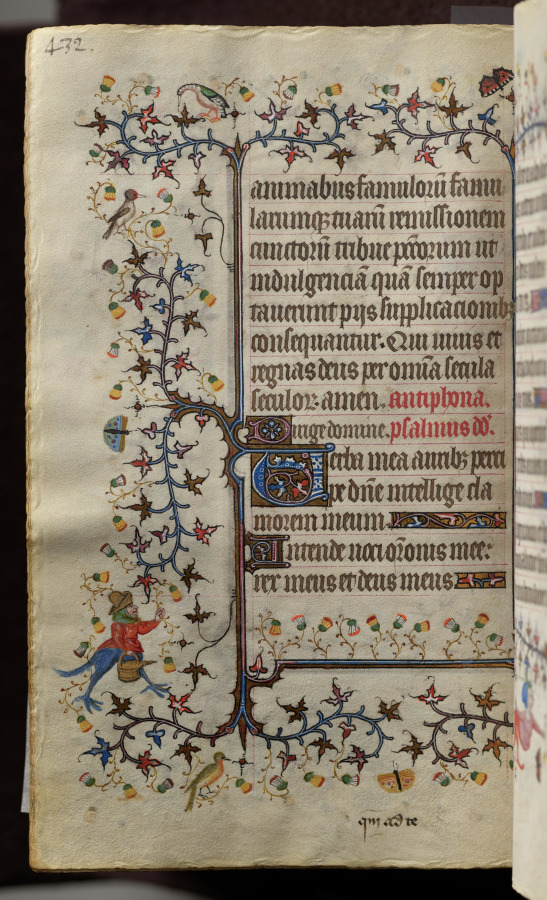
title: Hours of Charles the Noble, King of Navarre (1361-1425): fol. 210v, Text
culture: France, Paris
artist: Master of the Brussels Initials and Associates (French)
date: c. 1405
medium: ink, tempera, and gold on vellum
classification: Bound Volume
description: This precious volume was obviously highly prized by its owner, the French-born King of Navarre, who had his coat of arms painted on no less than twenty folios. Rather than directly commissioning this manuscript from a specific workshop, it seems that Charles the Noble acquired his book of hours -- perhaps ready-made for the luxury market -- while on a trip to Paris in 1404-05. A collaborative effort, six painting styles are evidenced within the pages of this codex, those of two Italians, two Frenchmen, and two Netherlanders. The painter who was responsible for the planning and decoration of the book, and who produced seventeen of the large miniatures, was a Bolognese artist known as the Master of the Brussels Initials. His principal assistant, responsible for most of the borders, was a Florentine who signed his name "Zecho" da Firenze on folio 208 verso.